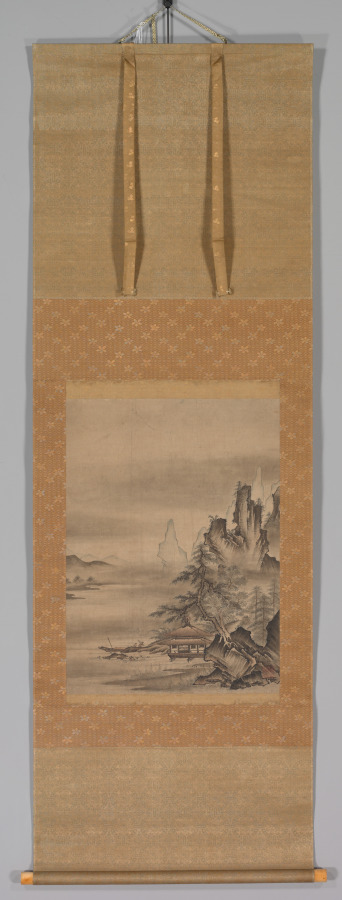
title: Returning Home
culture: Japan, Muromachi period (1392–1573)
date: mid-1500s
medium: hanging scroll, ink and color on paper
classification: Painting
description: This painting bears a seal reading Shōkei. The style of the seal resembles that used by Kenkō Shōkei (active about 1470–after 1523), a monk and painter at the Zen temple Kenchōji in Kamakura who studied in Kyoto for three years with Geiami (1431–1485?), painter to the shogun as well as curator of the shogun’s collection of art. However, the seal was carved to look like Shōkei’s and added to the painting at a later date by someone who thought the unsigned landscape was similar to his work. The painting has compositional and some stylistic similarities to images by other Kanto-based artists like Maejima Sōyū (active mid-1500s), who trained with Kano school artists. Specifically, the pines clinging to the massive boulder in front of a pavilion with mountains receding into atmospheric space—in a composition weighted in a single corner of the painting—is a Kanto-inflected derivation of the painting of the Zen monk-painter Tenshō Shūbun (active about 1414), whose work was a major inspiration for Kano school painters.